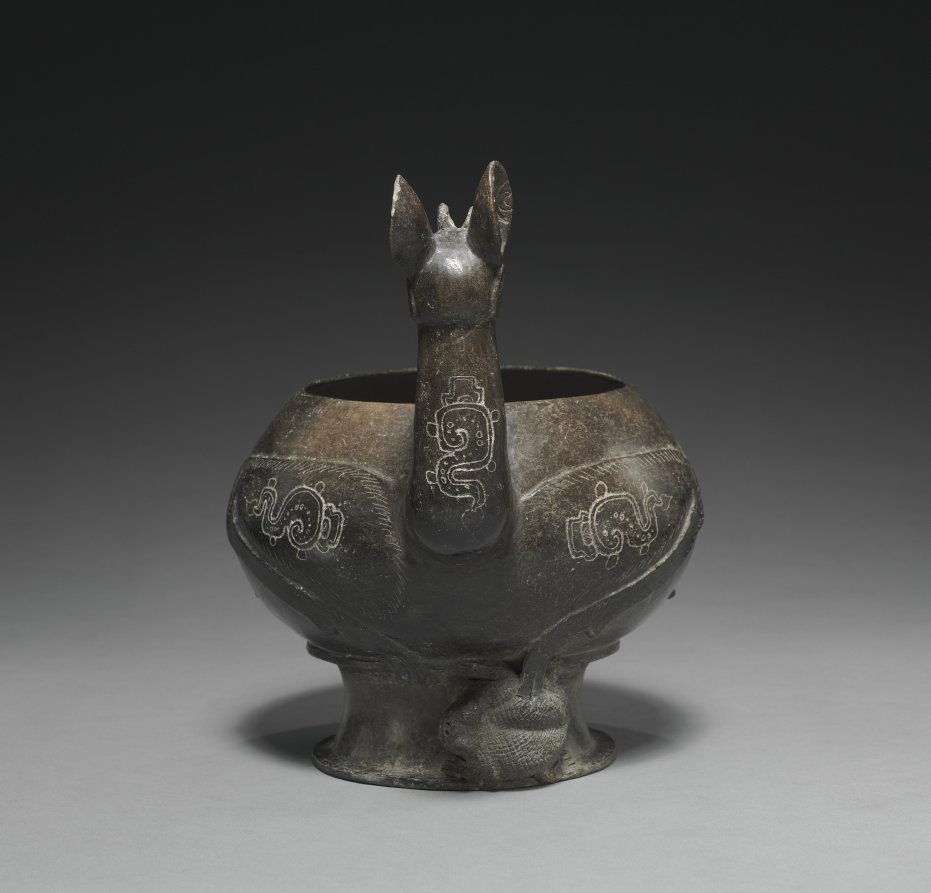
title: Deer Effigy Vessel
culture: Mesoamerica, Maya style, Classic Period (250-900)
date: 250–600 CE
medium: earthenware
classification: Ceramic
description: Maya artwork from the Early Classic Period (about AD 250-600) is dominated by three-dimensional sculpture in jade, stone, wood, and especially ceramic. This vessel is an exceptionally elegant example of Maya blackware, produced by firing earthenware pottery in a reducing (low oxygen) atmosphere. The deer is frequently depicted in Maya art, usually as a victim of either hunting or sacrifice. Venus signs and conch shells engraved on the deer also suggest death, for the planet Venus was regarded as a bringer of ill-fortune, and conch shell trumpets were carried by hunters. The small frog or toad pressed firmly under the deer's hoof relates to agricultural fertility. The croaking of these amphibians was a harbinger of rain.